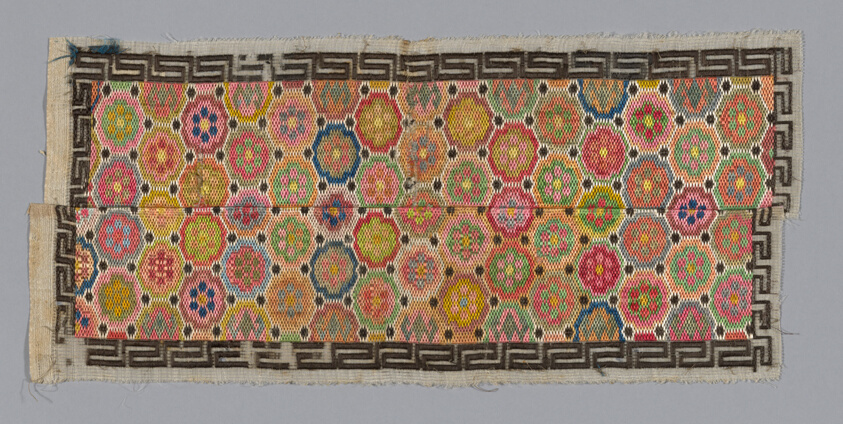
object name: Textile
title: Panel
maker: Han-Chinese (China)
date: Qing dynasty (1644–1911), 1875/1900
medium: Forty-four pairs and eight odd pieces of embroidered sleeve, ankle bands, etc. on gauze.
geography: China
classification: embroidery; textile